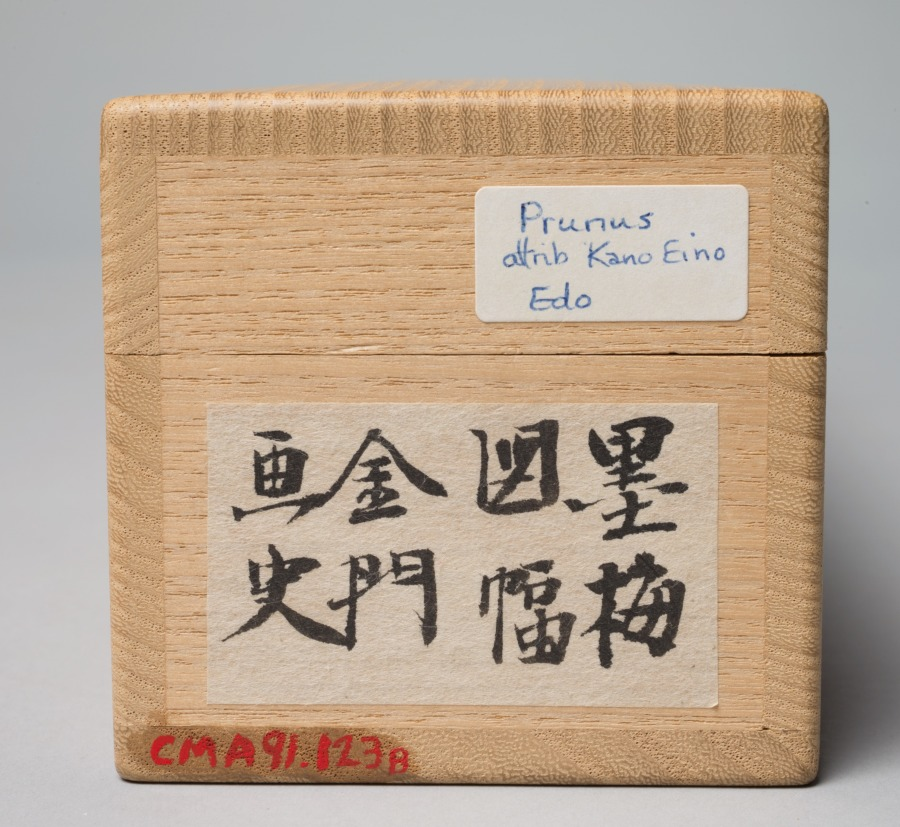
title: Prunus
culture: Japan, Edo period (1615–1868)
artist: attributed to Kano Einō (Japanese, 1631–1697)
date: mid- to late 1600s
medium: hanging scroll; ink on paper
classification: Painting